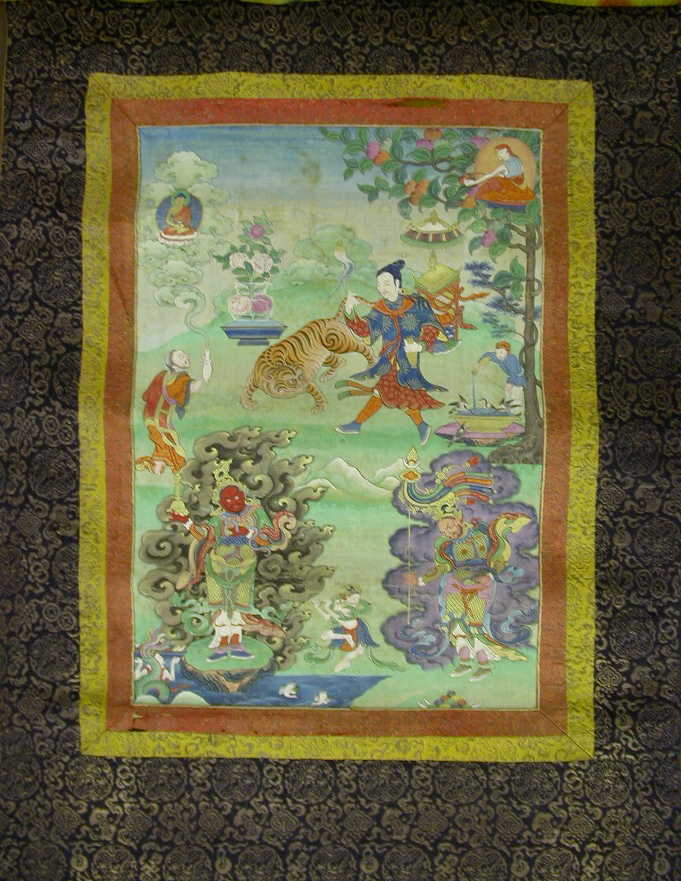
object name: Painting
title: Painted Banner (Thangka) from a Set of Seven Honoring Gayadhara, a Sakya Pandit from India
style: Himalayan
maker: Tibet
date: 19th century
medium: Pigment on cloth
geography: Tibet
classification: hanging scroll; asian art; painting